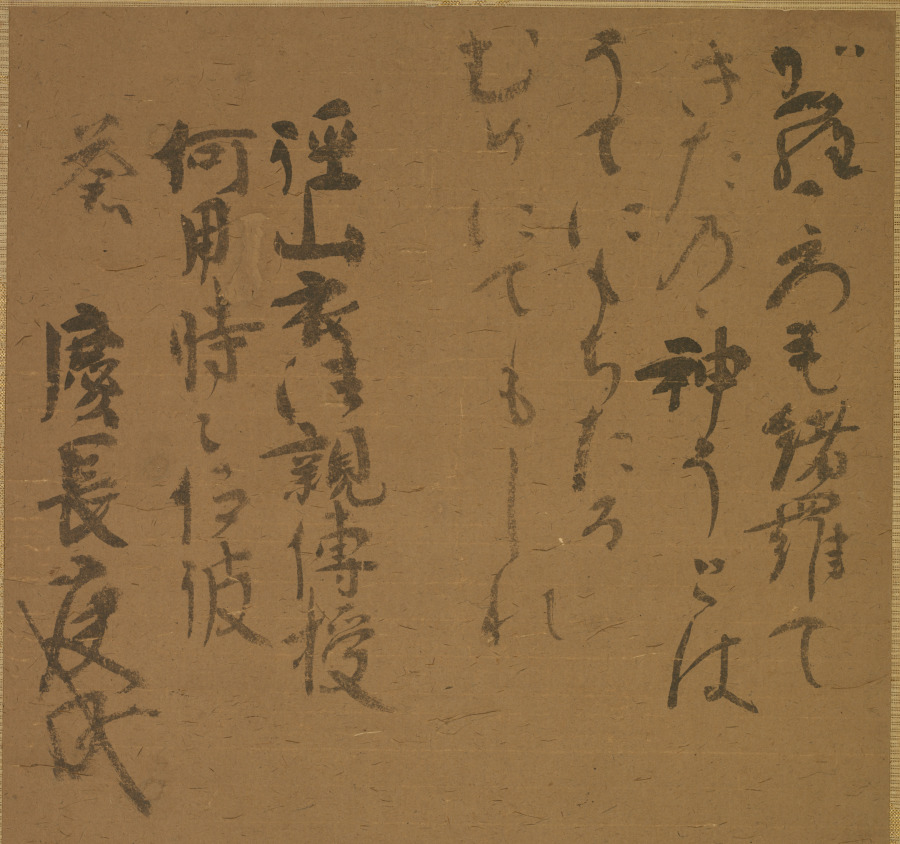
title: Tenjin Traveling to China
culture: Japan, Momoyama period (1573–1615)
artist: Konoe Nobutada (Japanese, 1565–1614)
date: 1610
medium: hanging scroll; ink on paper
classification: Painting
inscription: signed: Nobutada's cipher signature kao inscribed: two poems above, dated Keicho 15